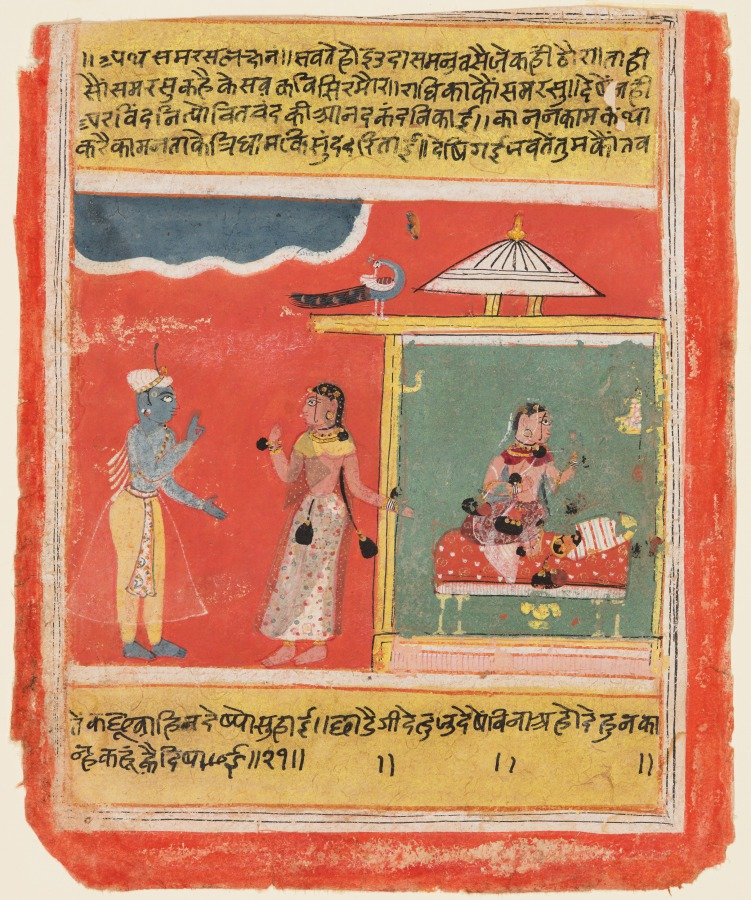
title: The Sentiment of Peace: Sama Rasa, from a Rasikapriya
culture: Central India, Madhya Pradesh, Malwa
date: 1634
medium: Gum tempera and gold on paper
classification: Painting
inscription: tha samarasa lakshana. savate hoi udāsa manu vasai eka hiṃ ṭhorā. tāhī soṃ samarasu kahai kesava kavi siramoura. radhikā kauṃ samarasu. dekheṃ nahiṃ araviṃdani tyoṃ vira vaṃda kī ānada kaṃda nikaī. kanana kamakatha karai kama na take tridhāma ki suṃdaritaī. dekhi gaī bhavateṃ tumakauṃ taba teṃ kachū vāhi na dekhyo suhaī. chādegī dehu ju dekheṃ binā aho dehu na kānha kahūṃ kai dikhaī. 21.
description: A lovesick heroine sits in a chamber with her head turned in disregard. A confidante (sakhi) explains her condition to Krishna and requests that he meet her. The sakhi raises her finger in concern and points toward the heroine with her other hand. Krishna, wearing Mughal turban and garments, gestures in agreement. The color palette is simple, and the composition is flat—hallmarks of early Malwa painting.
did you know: A peacock perches on the terrace of the heroine, accentuating her loneliness.